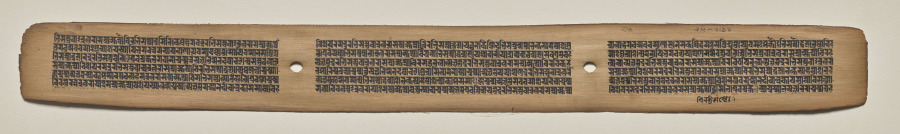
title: Text, Folio 111 (recto), from a Manuscript of the Perfection of Wisdom in Eight Thousand Lines (Ashtasahasrika Prajnaparamita-sutra)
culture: Eastern India, Bihar, Vikramashila Monastery. Painting: Nepal, Kathmandu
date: Sunday, September 14, 1119 (year 239 of the Newar Samvat in the month of Ashvina)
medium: gum tempera and ink on palm leaves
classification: Painting